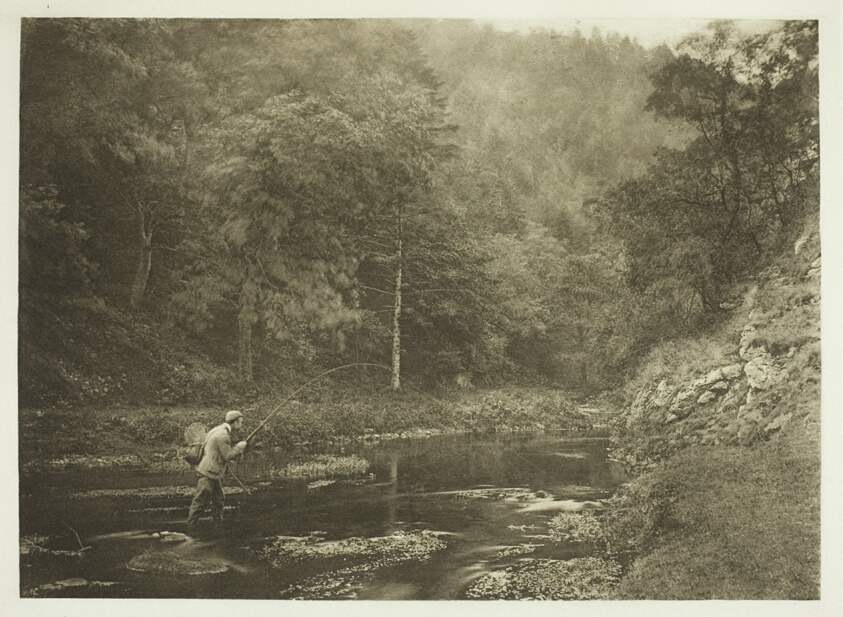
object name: Photograph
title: In Dove Dale. "Habet!"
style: 19th century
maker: Peter Henry Emerson (English, born Cuba, 1856–1936)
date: 1880s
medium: Photogravure, plate XXXVIII from the album "The Compleat Angler or the Contemplative Man's Recreation, Volume II" (1888)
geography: England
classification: photogravure; photomechanical process; photography; photograph